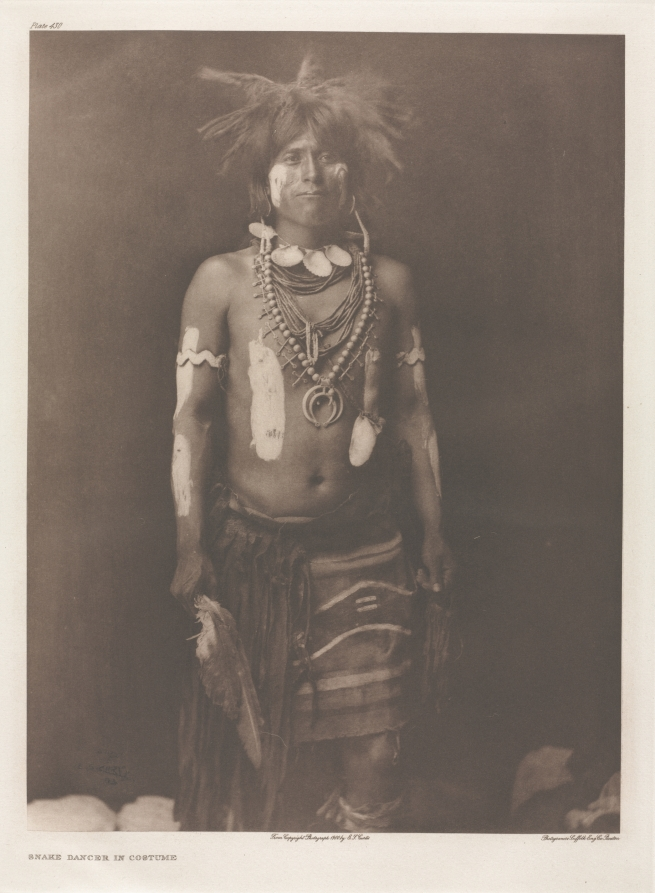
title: Portfolio XII, Plate 430: Snake Dancer in Costume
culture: America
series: The North American Indian: being a series of Portfolios picturing and describing the Indians of the United States, the Dominion of Canada, and Alaska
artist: Edward S. Curtis (American, 1868–1952)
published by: The University Press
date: 1900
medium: photogravure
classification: Portfolio